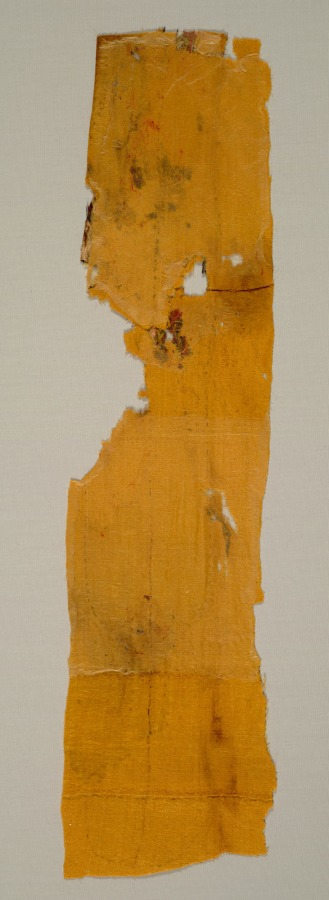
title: Clavi (Decorative Band)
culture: Egypt, Umayyad period (661–750) or Abbasid period (750–1258)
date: 700s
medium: wool; plain weave with slit-tapestry weave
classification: Textile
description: Figures and winged animals from ancient Greece and Rome remained popular during the early Islamic period of the Umayyad and Abbasid dynasties. The naked figure could represent Dionysus, the Greek god of wine; he holds his thyrsus, a staff decorated with ivy leaves and pinecones, while pouring liquid from a small jug for the panther. These colorful designs probably adorned the sleeve and front or back of a tunic, a garment worn directly on the body for over 1,000 years, from Roman antiquity to the Middle Ages. Popular decorations were regularly reused and sewn onto new tunics, as can be seen on this winter garment made of wool.